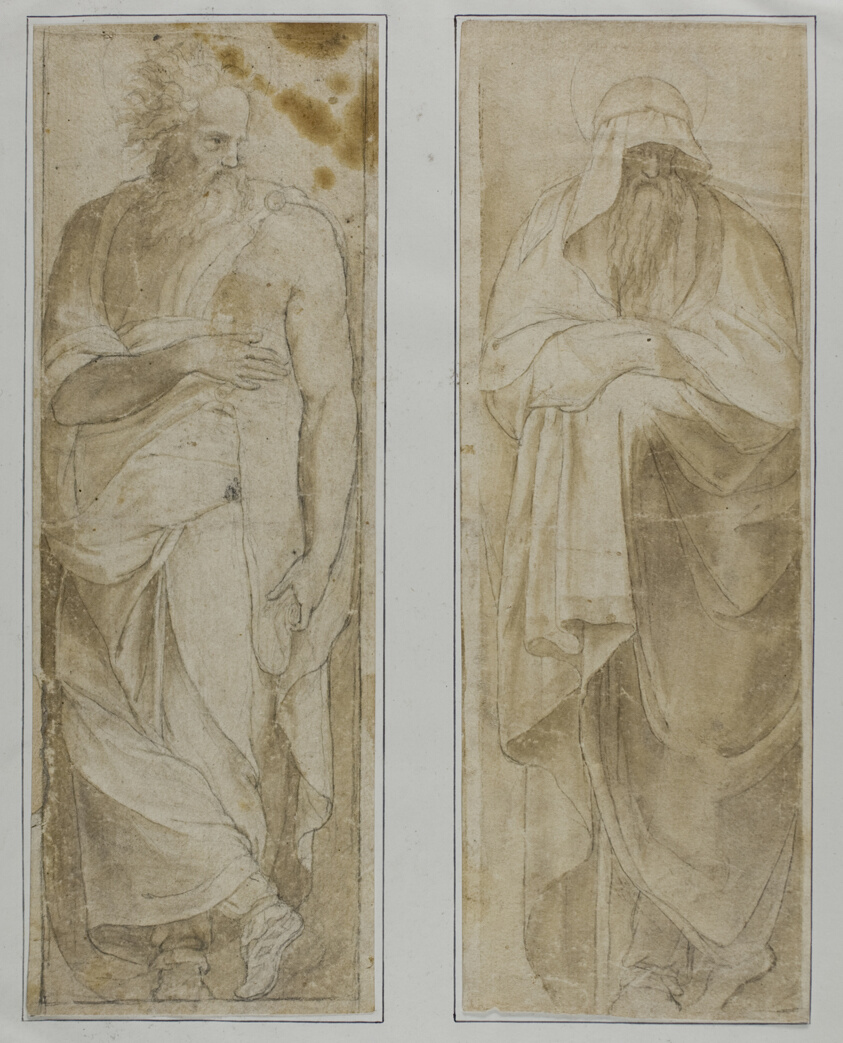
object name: Drawing and Watercolor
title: Standing Prophet or Apostle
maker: After Pellegrino Tibaldi (Italian, 1527-1596); and Perino del Vaga (Italian, 1501-1547)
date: 1545/50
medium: Black chalk, with brush and brown wash, on ivory laid paper, tipped on to ivory wove paper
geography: Italy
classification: chalk with wash; drawings (visual works); prints and drawing